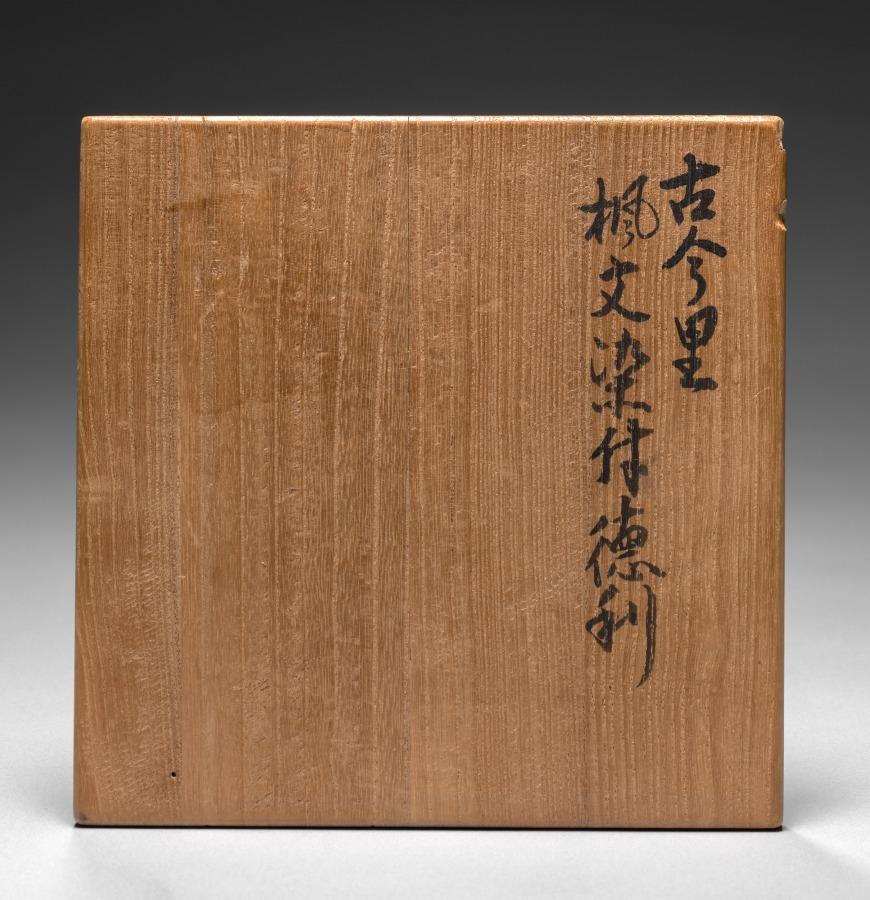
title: Bottle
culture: Japan, Edo period (1615–1868)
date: early 1600s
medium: porcelain painted in underglaze blue (Hizen ware, Arita type, Imari style)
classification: Ceramic